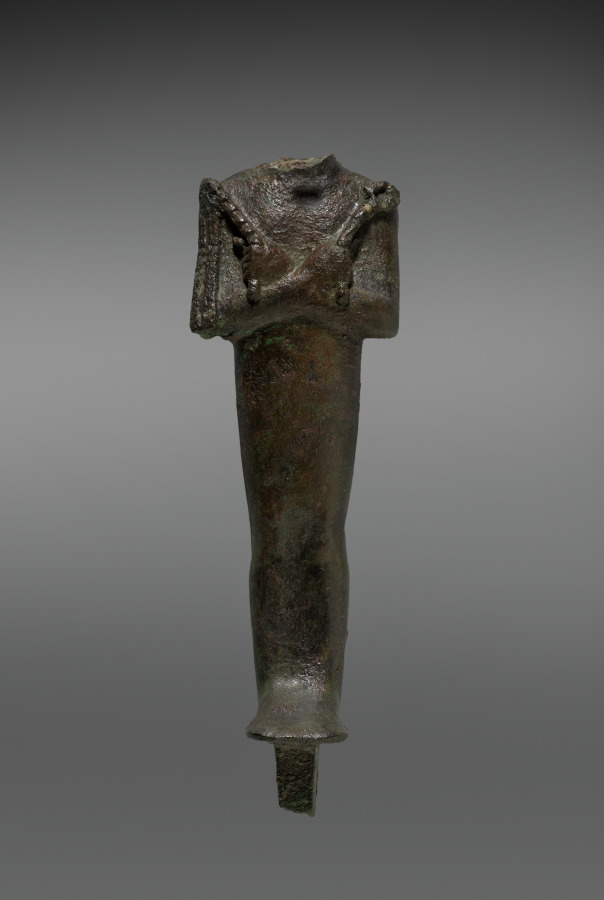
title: Statuette of Osiris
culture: Egypt, Late period (715–332 BCE), Dynasty 26 or later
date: 664–525 BCE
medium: black copper (?), hollow cast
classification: Sculpture